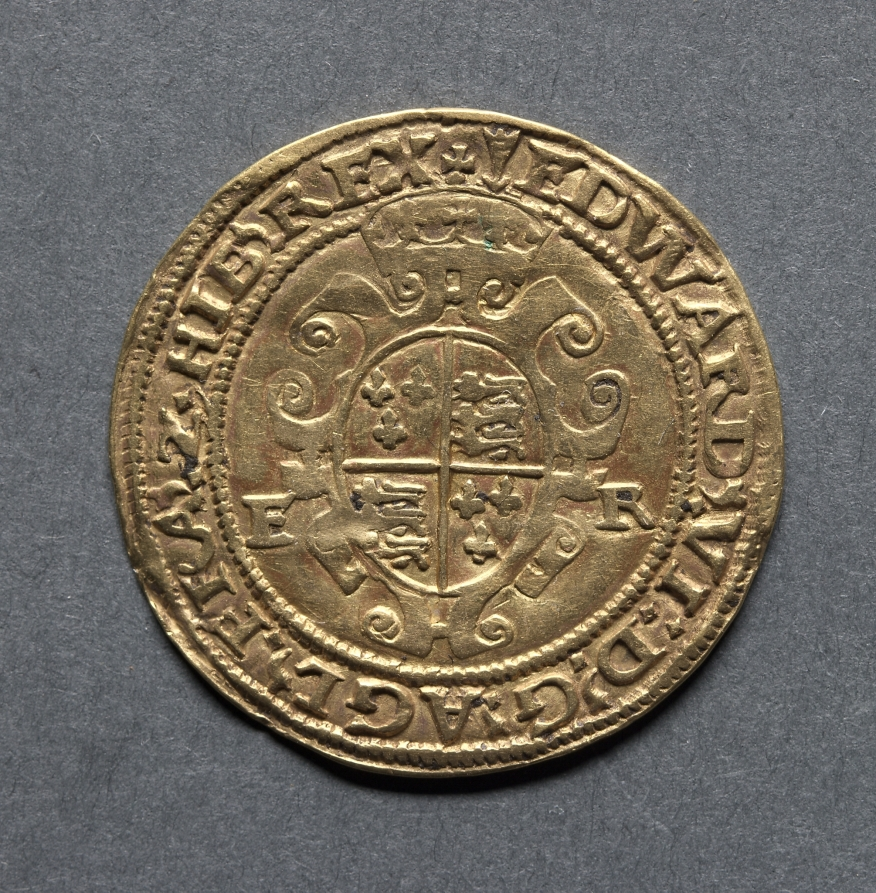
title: Half Sovereign: Crowned Royal Arms (reverse)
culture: England, Edward VI, 1547-1553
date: 1549–1550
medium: gold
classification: Coins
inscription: EDWARD VI D G AGL FRA HIB REX